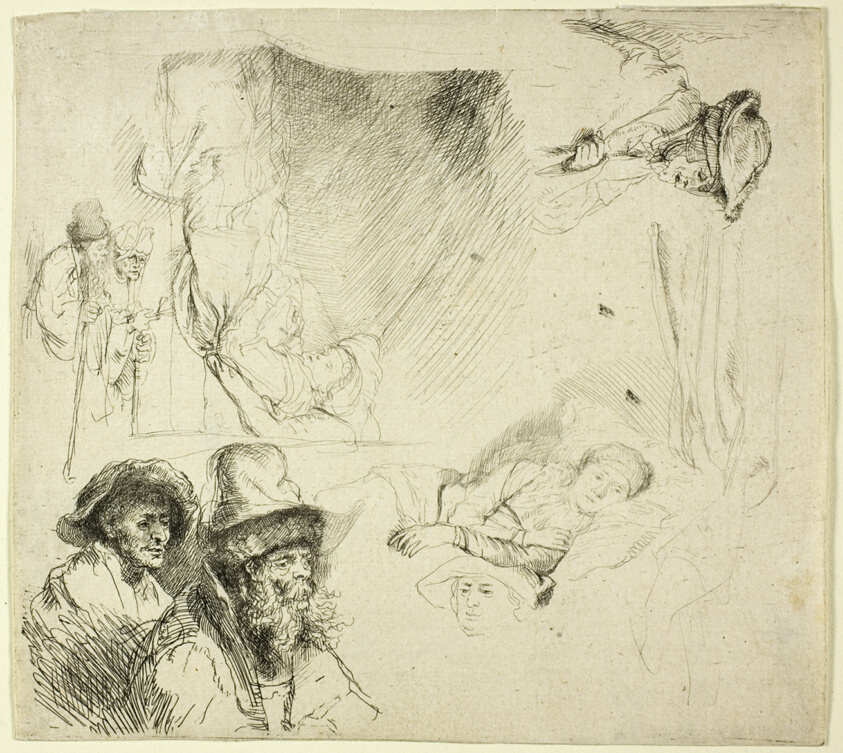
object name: Print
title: Sheet of Studies, with a Woman Lying Ill in Bed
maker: Rembrandt van Rijn (Dutch, 1606-1669)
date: c. 1639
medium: Etching on white laid paper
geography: Holland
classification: etching; print; prints and drawing; paper